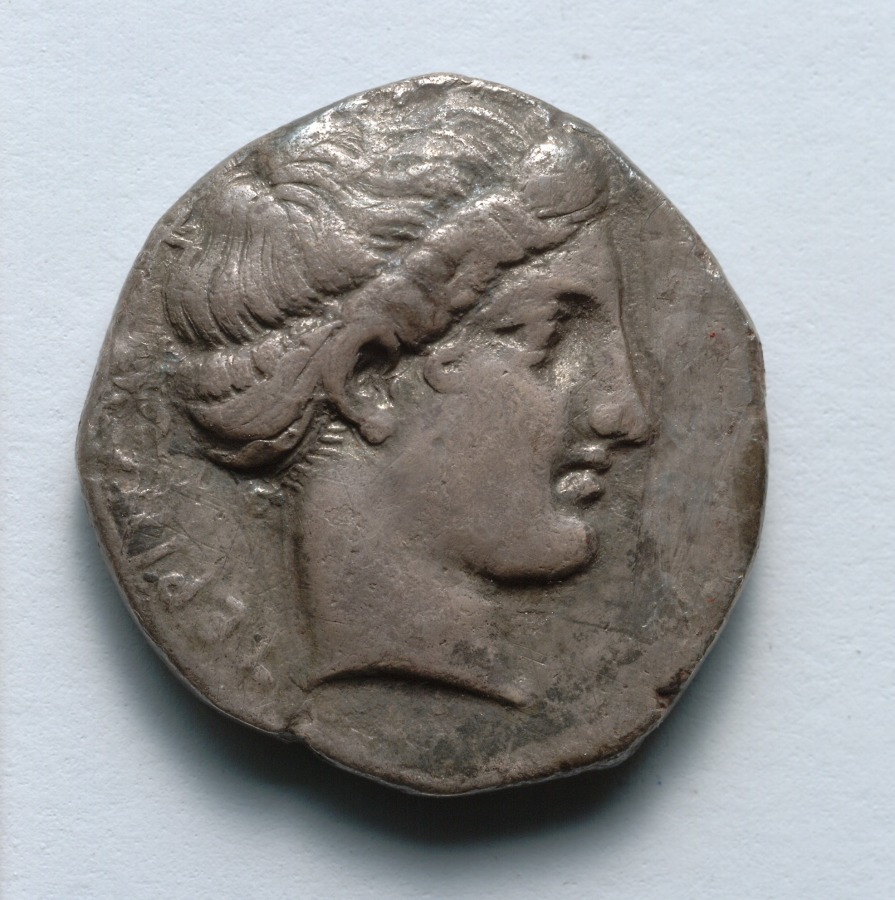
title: Stater: Head of Nymph (Obverse); Nike (Reverse)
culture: Greek, minted at Terina (South Italy)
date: c. 420–400 BCE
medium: silver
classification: Coins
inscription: ΤΕΡΙΝΑΟΝ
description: Coins from the South Italian colony of Terina are notable for their sophisticated reworkings of other cities’ designs. On the obverse of this tetradrachm is a female head with short, wavy hair, possibly modeled on the Syracusan nymph Arethousa. The reverse captures an intimate moment as Nike sits, tenderly holding a bird, much like young women in Athenian funerary sculptures.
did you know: Nike sits on a cippus, a pillar used as a boundary stone or grave marker.